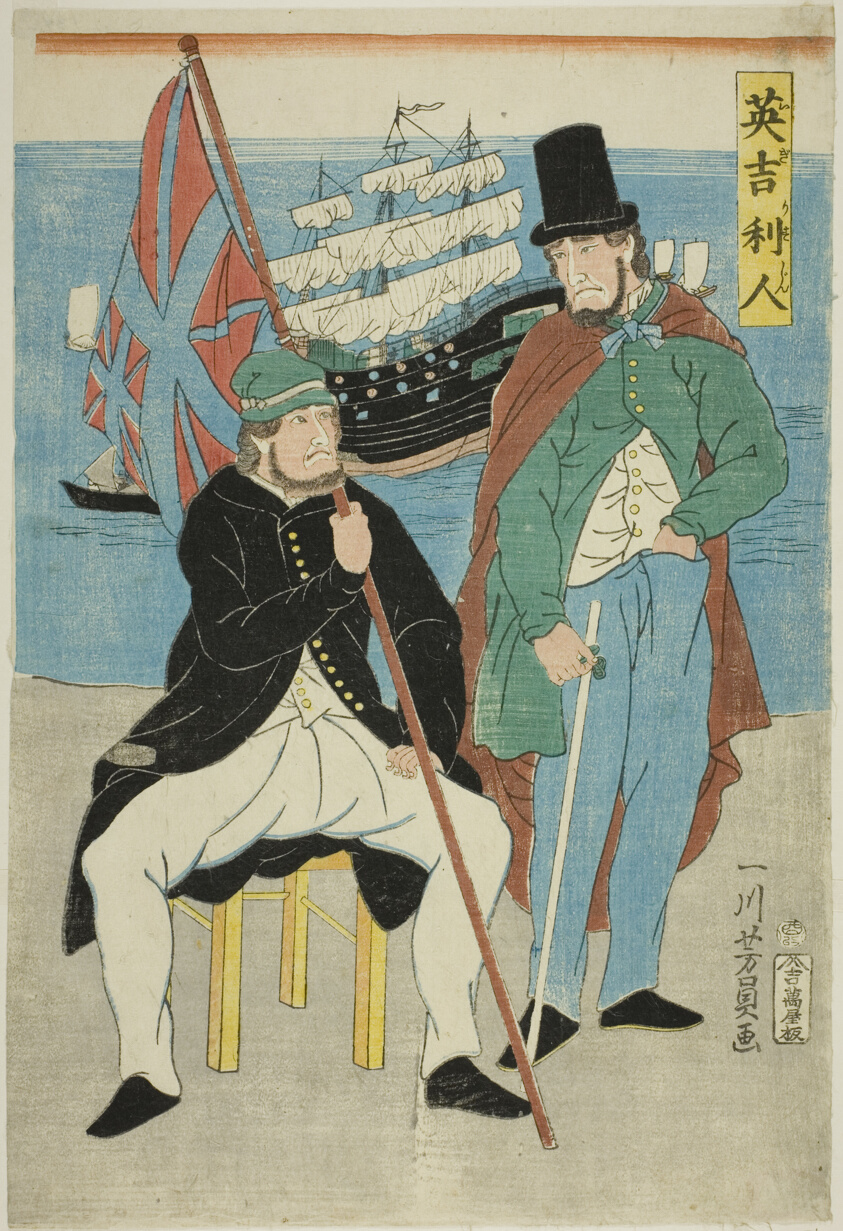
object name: Print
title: Englishmen (Igirisujin)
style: Japanese (culture or style)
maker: Utagawa Yoshikazu (Japanese, active c. 1850–70)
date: 1861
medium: Color woodblock print; oban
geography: Japan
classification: woodblock print; print; asian art